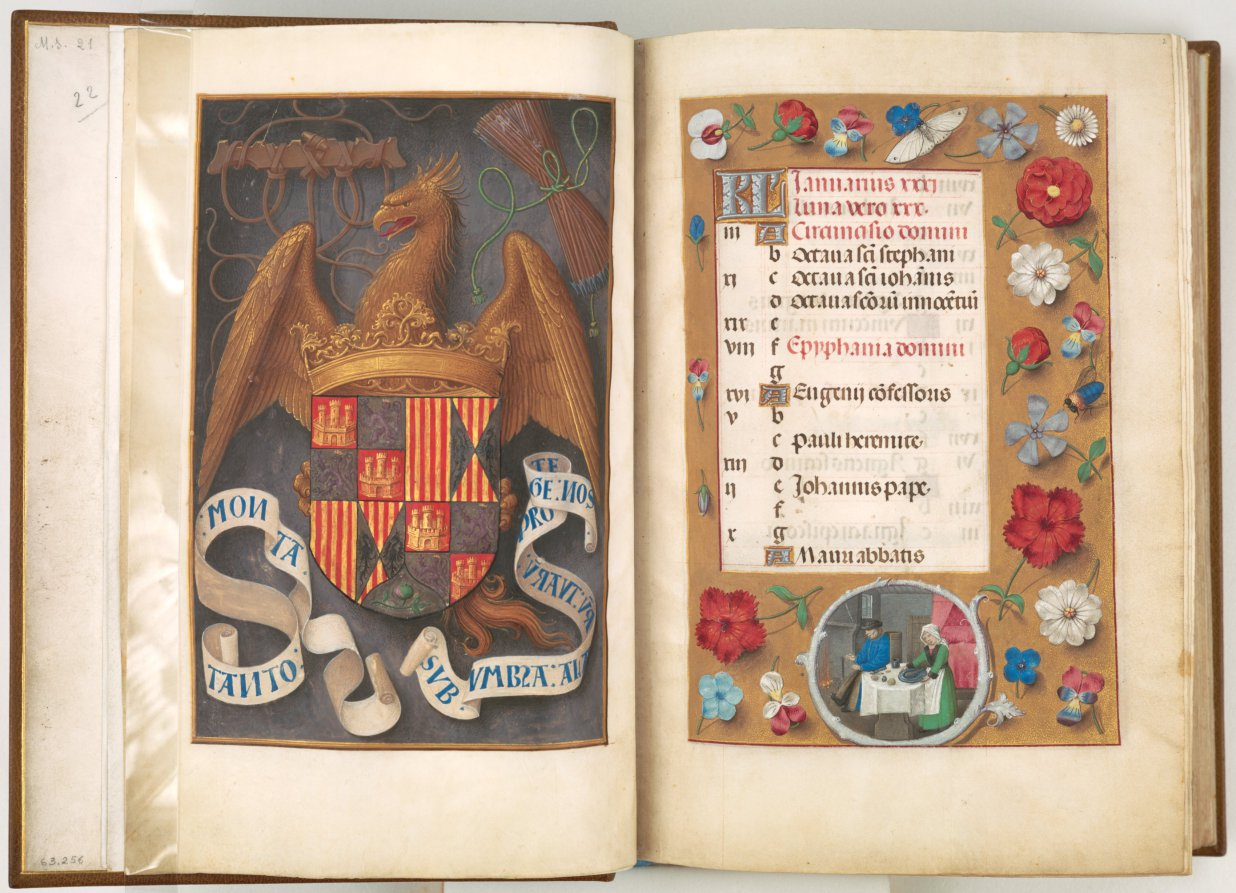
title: Hours of Queen Isabella the Catholic, Queen of Spain: Fol. 2r, January - Feast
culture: Flanders, Ghent and Bruges, late 15th century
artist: Master of the First Prayerbook of Maximillian (Flemish, c. 1444–1519)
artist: and Associates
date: c. 1500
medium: ink, tempera, and gold on vellum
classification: Bound Volume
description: This manuscript was illuminated by a circle of at least five highly organized manuscript painters active in the Flemish cities of Ghent and Bruges. The principal illuminator was Alexander Bening, who painted the majority of the book's miniatures. Manuscripts produced by this circle of artists are renowned for the decoration of their borders, which typically feature a rich variety of realistically painted flowers, birds, and butterflies. This prayer book, called a book of hours, was intended not for a cleric but for the private devotions of a lay person—in this case, Isabella the Catholic, Queen of Spain (1451–1504); her coat of arms embellishes the book's frontispiece. It is unlikely that the book was commissioned by the Queen herself; rather, she probably received it as a diplomatic gift from someone courting her patronage, perhaps Cardinal Francisco Jimenez de Cisneros. A Franciscan friar, Jimenez was dependent upon Isabella for his advancement, first to the post of Queen's confessor in 1492, and then to Archbishop of Toledo in 1495.